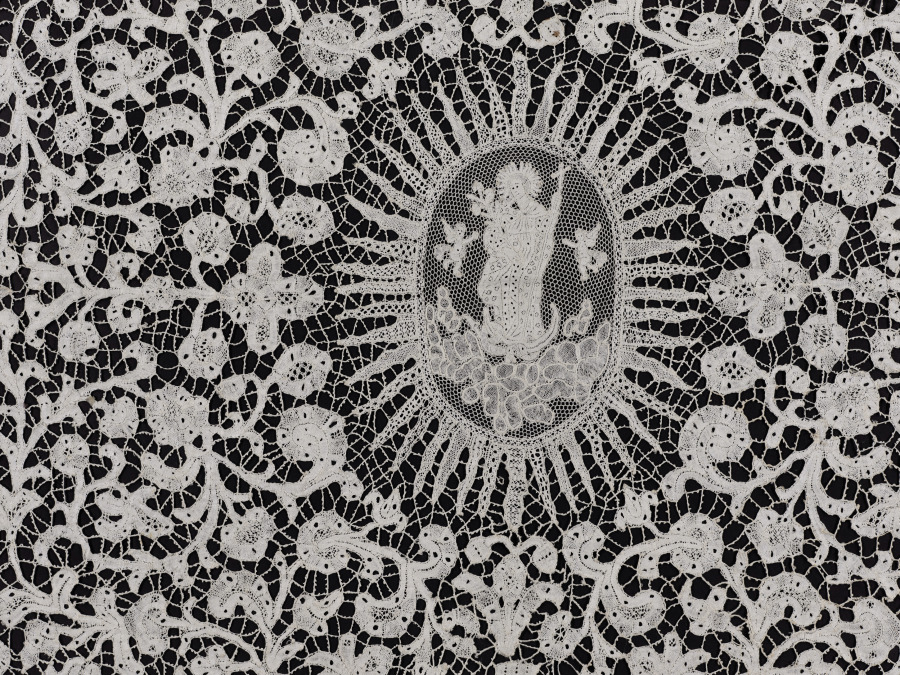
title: Lace Benediction Veil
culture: Flanders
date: 1600s–1700s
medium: Bobbin lace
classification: Lace